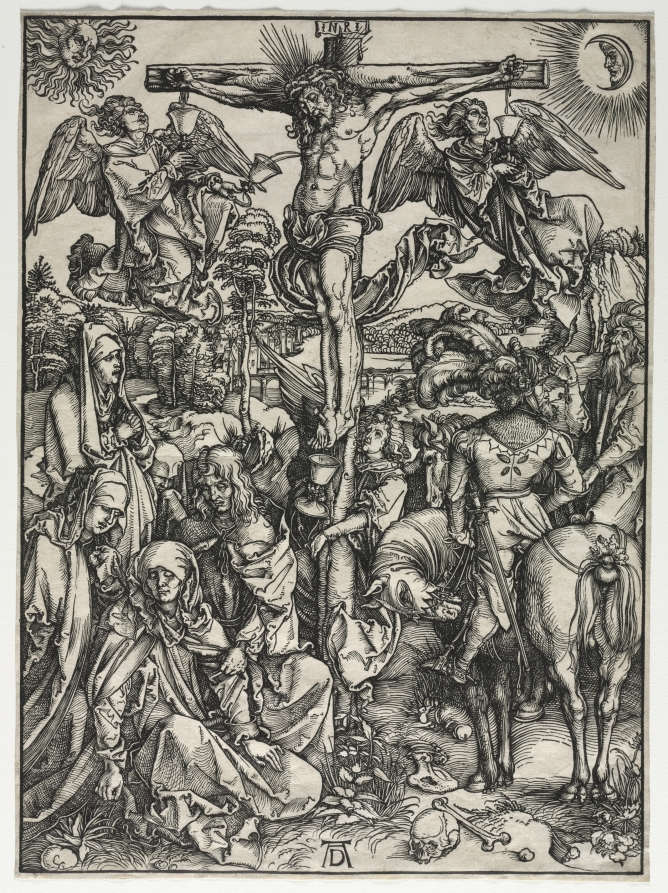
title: The Large Passion: The Crucifixion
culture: Germany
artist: Albrecht Dürer (German, 1471–1528)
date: c. 1497–1500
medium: woodcut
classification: Print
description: Dürer made seven of the twelve woodcuts for The Large Passion between 1497 and 1500 and then produced four additional woodcuts in 1510. The following year he published the series in book form with a frontispiece and Latin verses composed by Benedict Schwalbe. The Nuremberg monk and poet's text was printed on the back of the sheets. At the same time, Dürer printed a second edition of The Apocalypse and the first edition of The Life of the Virgin. The scenes of The Large Passion executed between 1497 and 1500 retain certain Gothic conventions: a wealth of detail; two-dimensional, awkward figures; ambiguous picture space; and confusing compositions. However, the strong contrast between the thick, black, expressive lines and the white paper creates a vitality lost in the prints from 1510, when Dürer's style changed dramatically.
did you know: The letters in the banderole above the cross, INRI, are an abbreviation of the Latin phrase Iesus Nazarenus Rex Judaeorum (Jesus of Nazareth the King of the Jews).